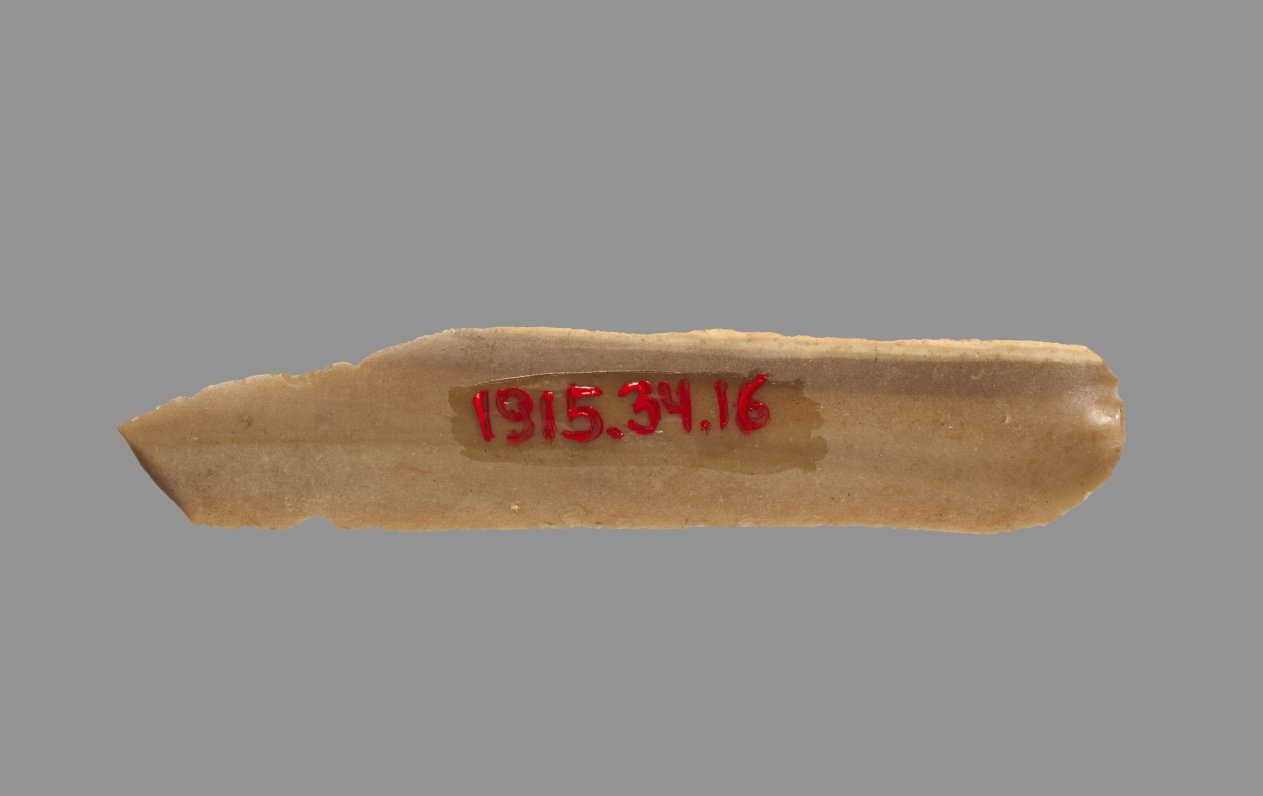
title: Sickle Blade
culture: Egypt, Middle Kingdom (2040–1648 BCE), Dynasty 12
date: 1980–1801 BCE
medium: flint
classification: Implements